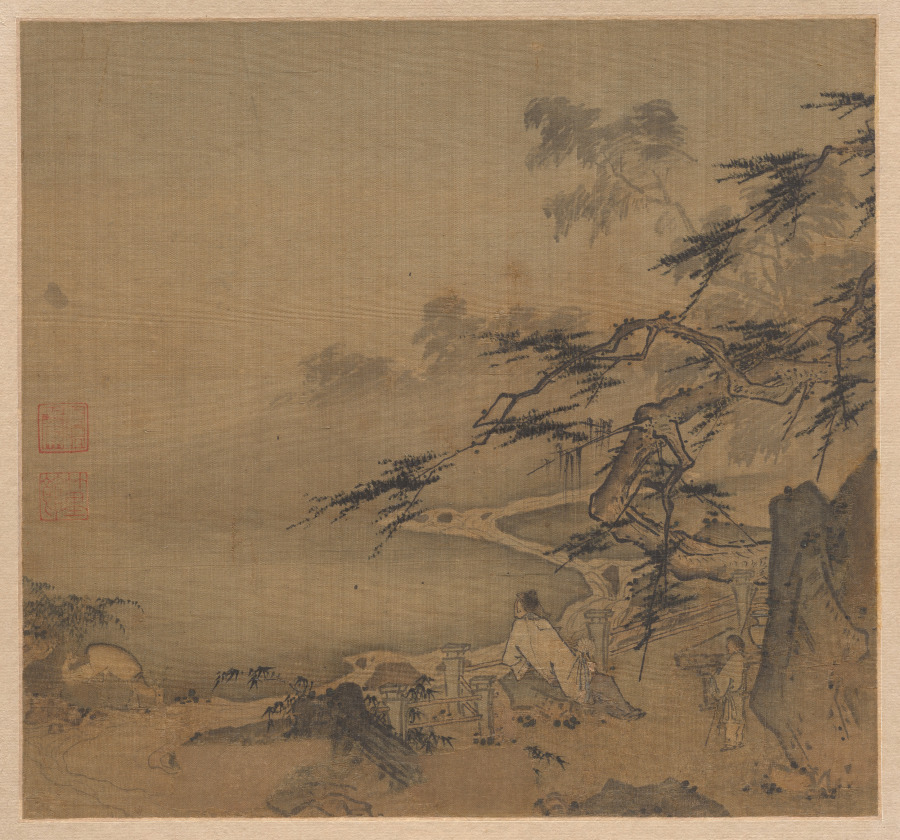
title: Watching the Deer by a Pine Shaded Stream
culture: China, Southern Song dynasty (1127-1279)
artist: Ma Yuan (Chinese, c. 1150–after 1255)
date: 1127–1279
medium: Album leaf; ink and light color on silk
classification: Painting